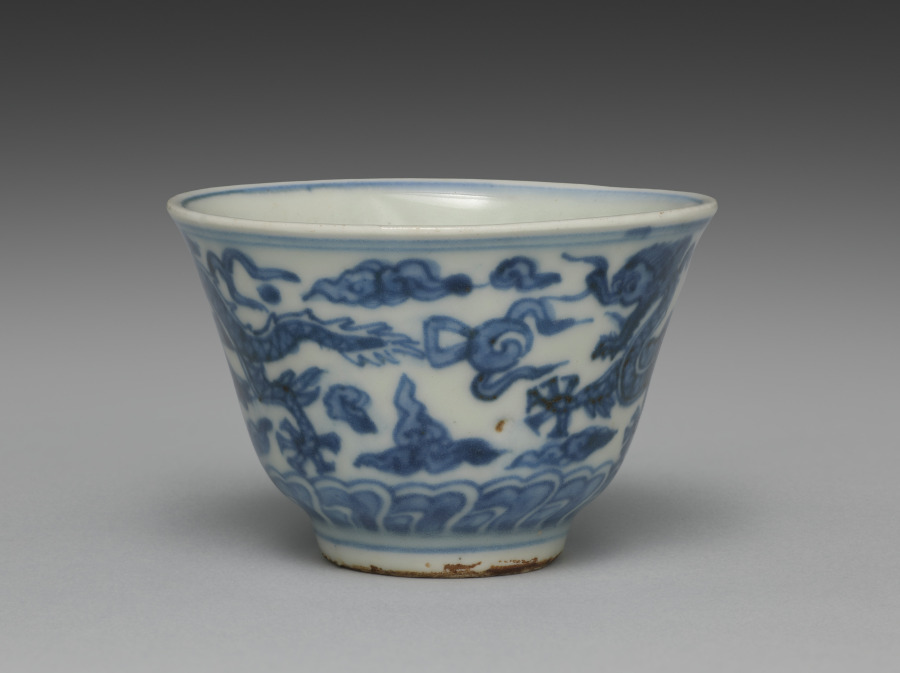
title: Cup from Tea Cups with Dragons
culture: Japan, Edo period (1615–1868)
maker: Seifū Yohei I (Japanese, 1801–1861)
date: 1840s–57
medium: One from a set of five tea cups; porcelain with underglaze blue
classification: Ceramic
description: Seifū Yohei I made both blue and white porcelains after Ming dynasty (1368–1644) Chinese wares fired in the kilns at Jingdezhen for export. He also made colorful stoneware in the style of his teacher, Nin’ami Dōhachi (Takahashi Dōhachi II) (1783–1855).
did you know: A small figure of an elephant serves as the handle for the lid.